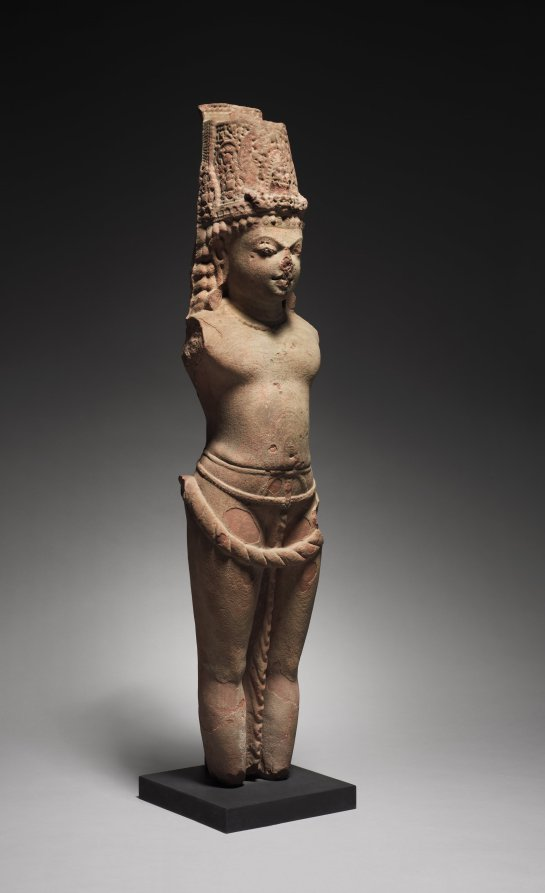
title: Standing Vishnu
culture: Northern India, Mathura, late Gupta Period (320-647)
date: late 500s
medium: red sandstone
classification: Sculpture